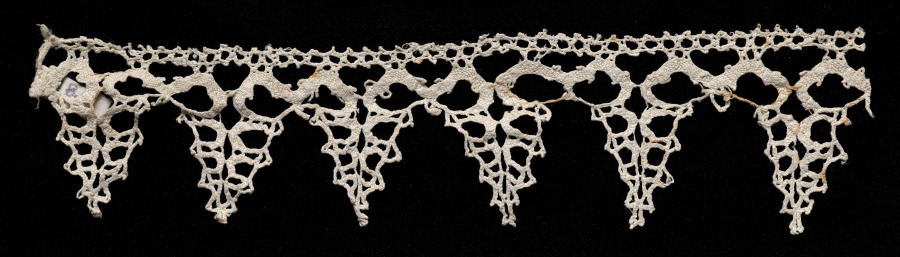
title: Lace Edging of Points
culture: Italy, Venice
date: 1500s–1600s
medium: Bobbin lace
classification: Lace